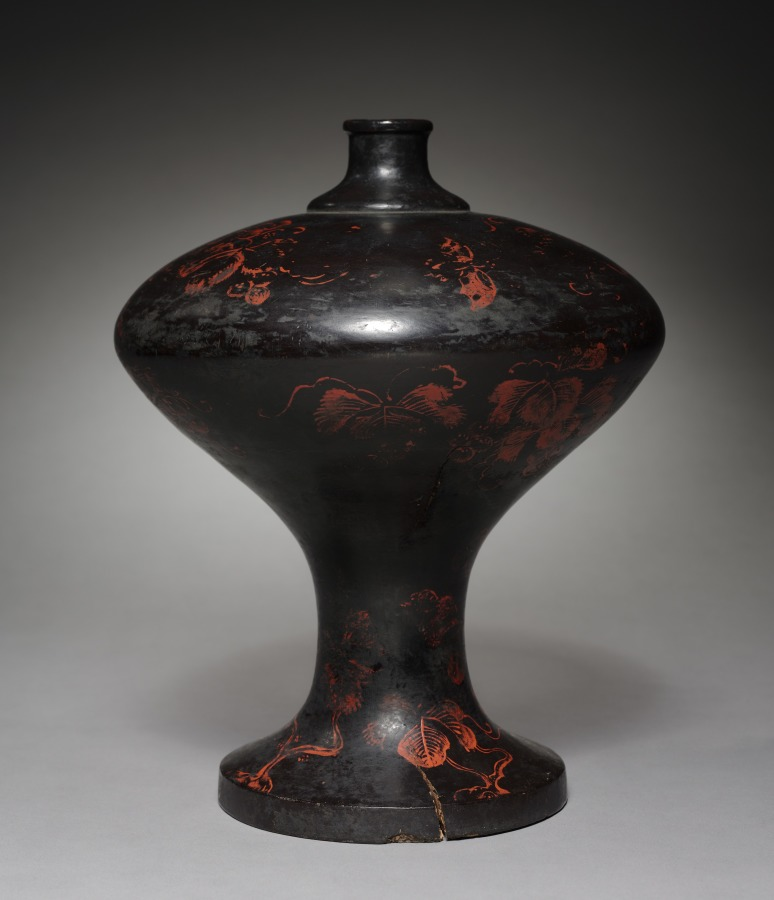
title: Sake Flask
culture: Japan, Muromachi period (1392–1573)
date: 1500s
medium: Black laquered wood with red lacquer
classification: Lacquer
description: This flask contained rice wine, or sake. Its wood body was shaped by a lathe before black lacquer was applied to the surface. A red lacquer design of grapevines, an auspicious motif, covers the surface. With their numerous, long-lasting fruits, grapevines traditionally symbolized fertility and longevity in East Asia.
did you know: The evocative imagery of brushed leaves and bunches of grapes suggest that the artist referred to a particular painting when decorating this vase.